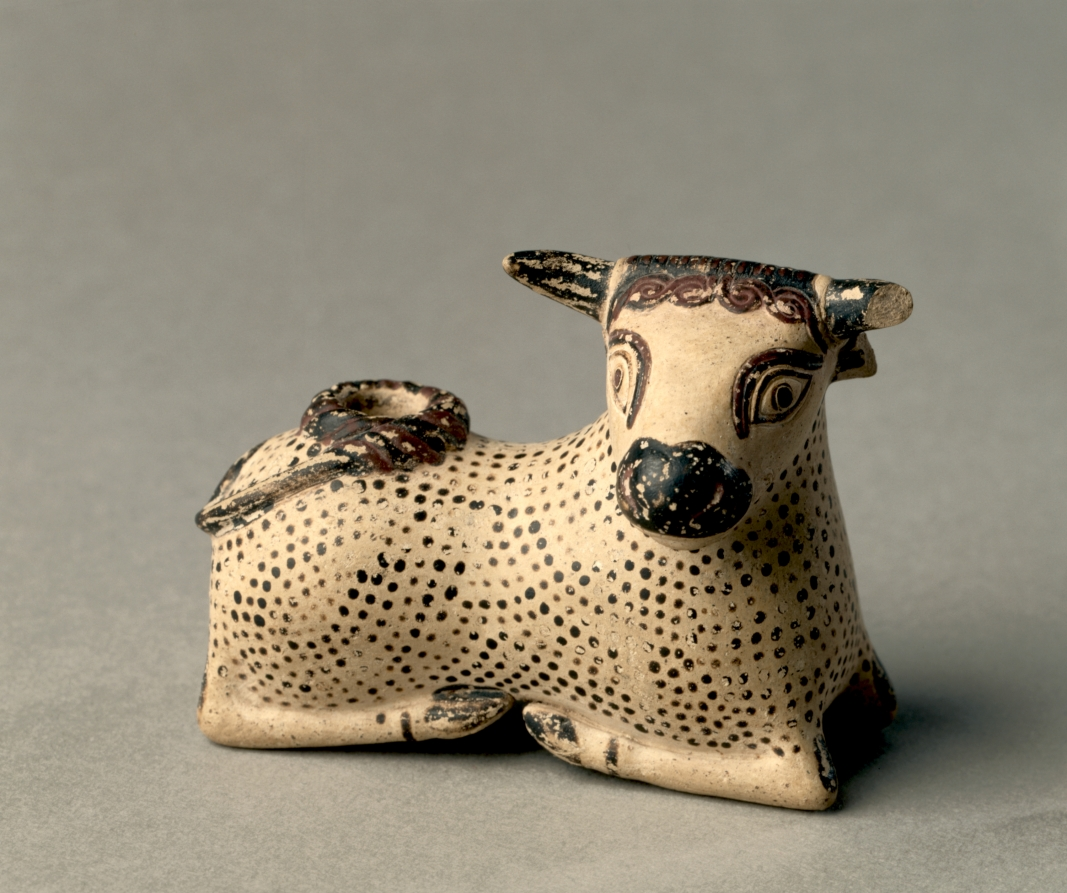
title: Oil Flask in the Shape of a Bull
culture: Greek, Corinthian or modern forgery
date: 600–575 BCE or 1900s CE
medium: ceramic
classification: Ceramic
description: This small bull-shaped flask is similar in form and painted decoration to a class of figure-shaped perfume vessels created during the late seventh and early sixth centuries BC in Greece and Italy (especially Corinth, Rhodes, and Etruria). The stippled body decoration characterizes such vases from multiple sites, while the light-colored clay and inconspicuous orifice placement are typical of Corinth. But no other reclining bulls are known among such vases (and only a few bullheads or upper bodies), raising questions about authenticity. A 1986 analysis determined that this object had been recently fired, and a 2020 clay analysis placed its origin in the Catalonia region of Spain, far from any known ancient production area for such flasks.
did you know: The curled tail masks a filling hole atop the back.